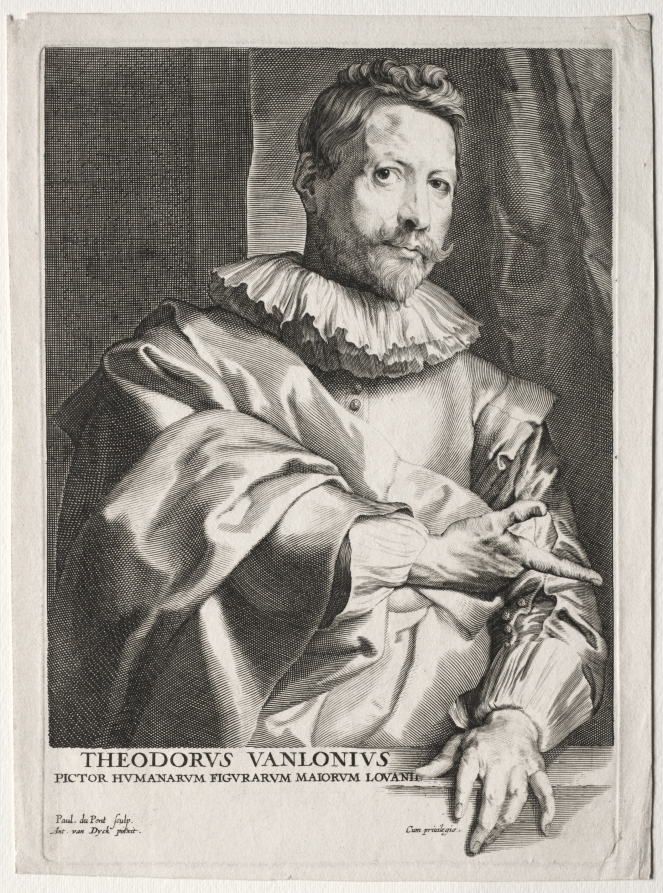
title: Theodoor Van Loon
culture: Flanders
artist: Paulus Pontius (Flemish, 1603–1658)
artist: after Anthony van Dyck (Flemish, 1599–1641)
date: 1630–33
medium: engraving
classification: Print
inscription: verso, in graphite: W 68 IV